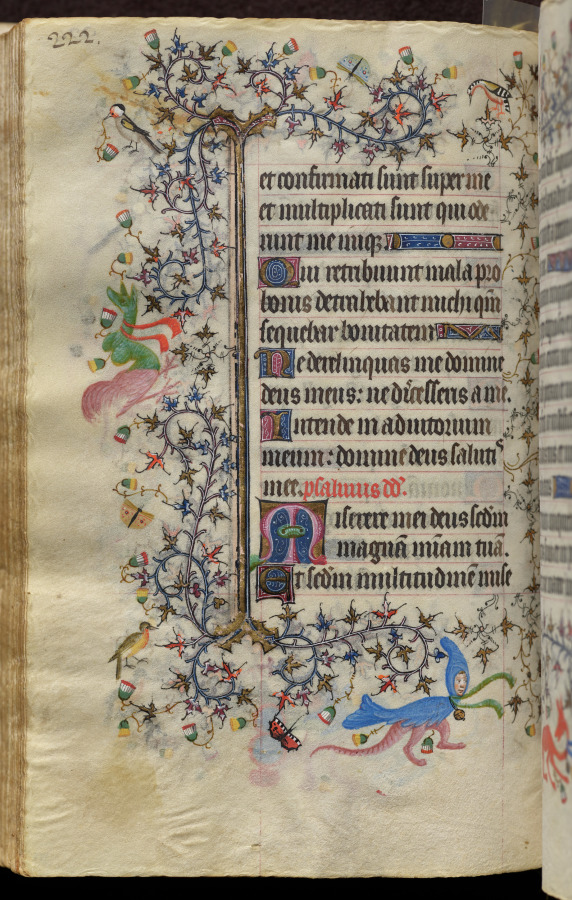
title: Hours of Charles the Noble, King of Navarre (1361-1425): fol. 111v, Text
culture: France, Paris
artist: Master of the Brussels Initials and Associates (French)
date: c. 1405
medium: ink, tempera, and gold on vellum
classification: Bound Volume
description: This precious volume was obviously highly prized by its owner, the French-born King of Navarre, who had his coat of arms painted on no less than twenty folios. Rather than directly commissioning this manuscript from a specific workshop, it seems that Charles the Noble acquired his book of hours -- perhaps ready-made for the luxury market -- while on a trip to Paris in 1404-05. A collaborative effort, six painting styles are evidenced within the pages of this codex, those of two Italians, two Frenchmen, and two Netherlanders. The painter who was responsible for the planning and decoration of the book, and who produced seventeen of the large miniatures, was a Bolognese artist known as the Master of the Brussels Initials. His principal assistant, responsible for most of the borders, was a Florentine who signed his name "Zecho" da Firenze on folio 208 verso.